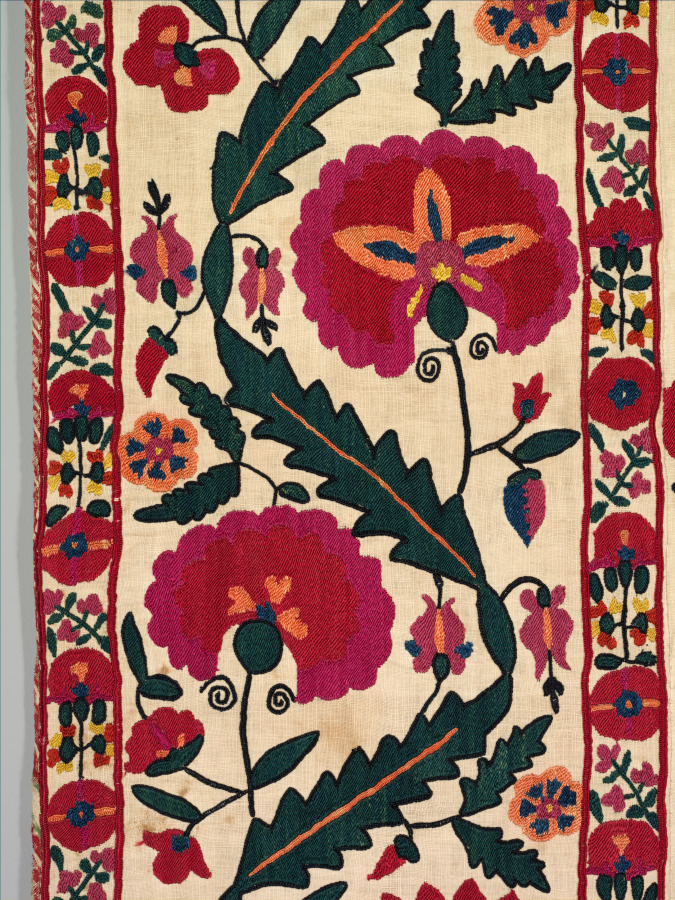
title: Suzani with floral sprays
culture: Central Asia, South West Uzbekistan, Shakhrisyabz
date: 1800–1850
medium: Cotton: plain weave, 6 strips; silk: embroidery; filling stitch: kanda xajol, occasionally bosma; outlining stitch: ilmoq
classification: Embroidery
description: Embroidered textiles were essential items in dowries. This type, known as a suzani after the Persian and Tajik word for needle, suzan, were created by mothers and daughters who proudly displayed them during wedding festivities and special occasions. This is an especially striking example, probably embroidered in Shakhrisyabz, located south of Samarkand in Uzbekistan, during 1800–1850. Suzani were made for numerous functions including the nuptial bed, curtains for storage niches, and wrappers for various dry goods. Floral and foliate motifs generally dominate as seen here, enriched with several shades of red and enhanced by the varied light reflections and colors of the silk thread. Possibly the motifs conveyed cosmological, apotropaic, medicinal, or fertility associations especially for married life. Patterns were drawn in black ink on several loosely joined cotton cloths by a skilled family member or a professional. The cloths were then separated, embroidered individually, and reattached, confirmed by mismatched motifs where the lengths are joined. They are generally attributed to nineteenth-century production after sericulture was introduced in the Merv area around 1800.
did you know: Six narrow lengths of handwoven cotton cloth were joined and then embroidered with vibrant silk thread to make this suzani.